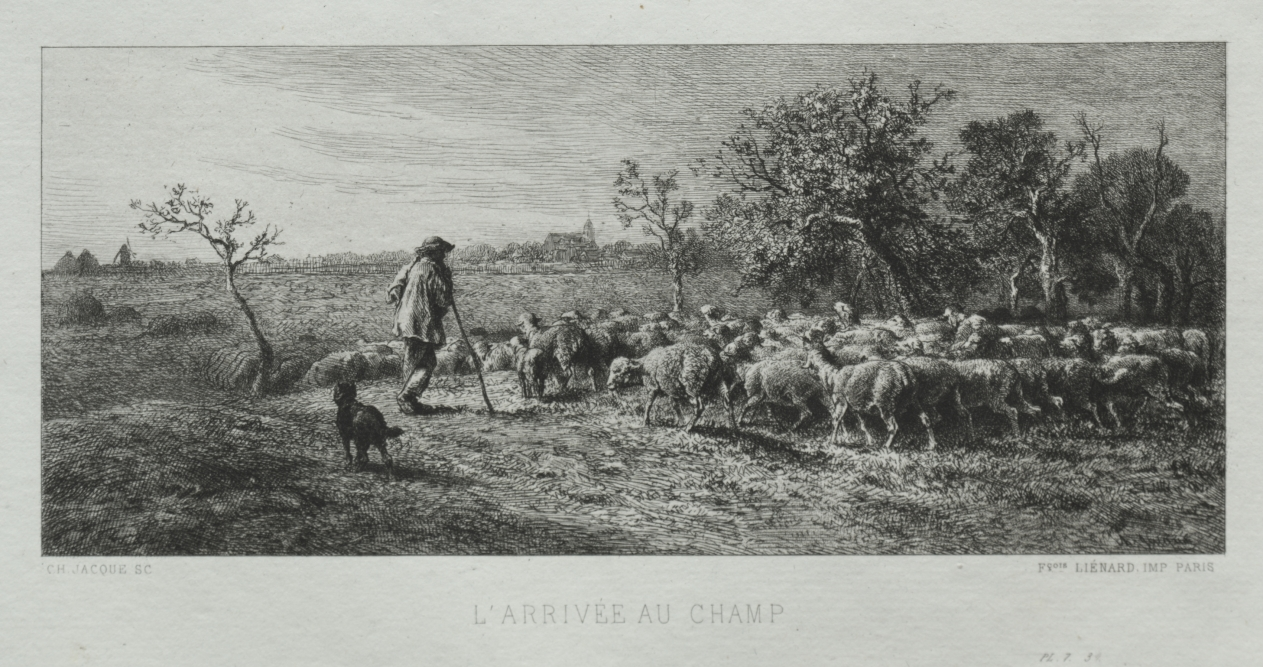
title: Arriving at the Field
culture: France, 19th century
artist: Charles-Émile Jacque (French, 1813–1894)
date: 1864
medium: etching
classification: Print